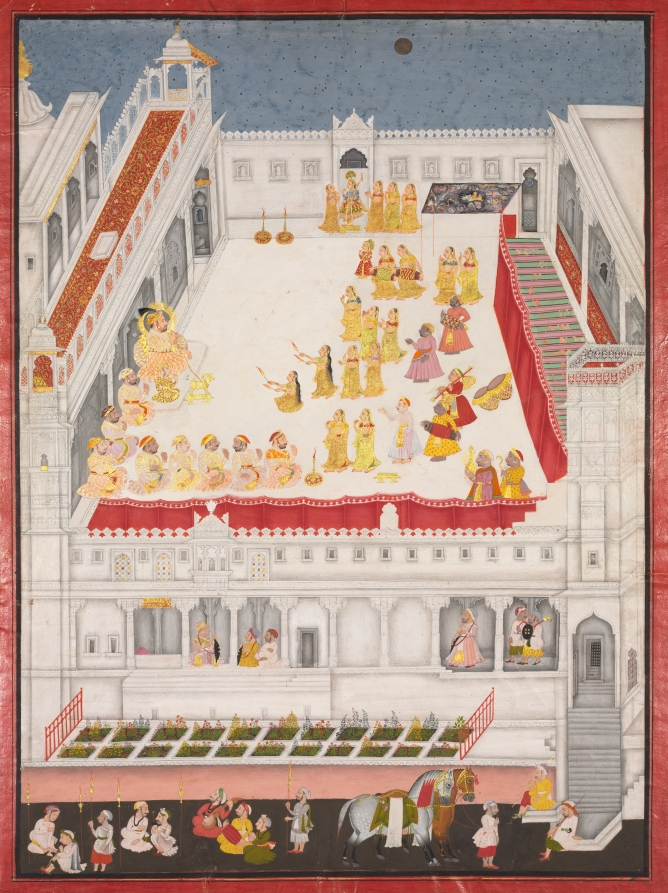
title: Maharana Jagat Singh Attending the Raslila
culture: Northwestern India, Rajasthan, Mewar, Udaipur, 18th century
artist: attributed to Jai Ram (Indian, active 1710–40)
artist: and/or Jiva (Indian, active mid-1700s)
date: 1736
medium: Gum tempera, gold, and silver on paper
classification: Painting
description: To celebrate the New Year festival of Diwali, dancers reenact the life story of the Hindu god Krishna in a palace courtyard by candlelight under the full moon. The king, a vassal of the Mughal emperor, sits with the halo of divine sanction for his rule at the left of the courtyard, smoking from a golden goat-shaped hookah, with his young son and heir at his side. At the top of the composition, a dancer dressed in blue with a peacock-feather crown plays the part of Krishna. In the upper right corner, a canopy painted with swirling storm clouds stands for the rainstorm sent by the jealous king of the gods, who is shown in the middle of the canopy with his consort and mount, the elephant with seven trunks. Guards and grooms in the foreground entertain themselves with music while they wait with the horses of visiting nobles. The formal geometric gardens, playful use of perspective, and individualized portraiture indicate the selective adoption of the styles and sensibilities of the imperial Mughal court in the paintings from this large-format series.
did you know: This painting is one of a set of eight.